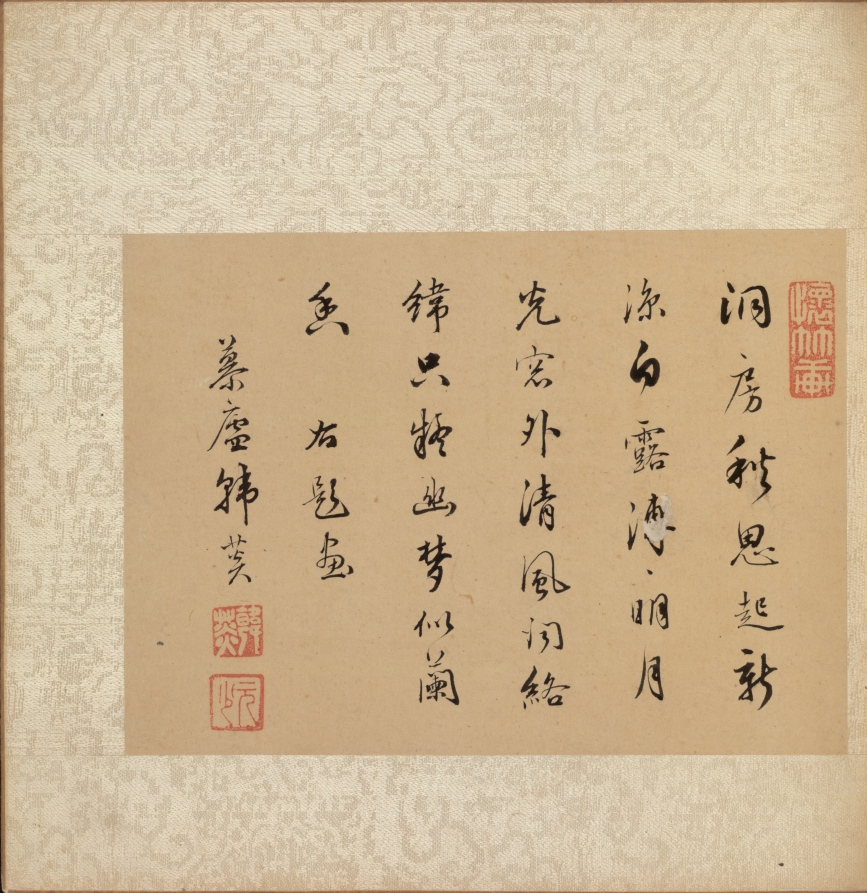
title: Album of Miscellaneous Subjects, Leaf 7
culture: China, Qing dynasty (1644-1911)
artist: Fan Qi (Chinese, 1616–after 1694)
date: early 1650s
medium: album leaf, ink and color on silk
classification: Painting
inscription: Artist seal: Fan Qi 樊圻. Poem by Han Tan 韓菼 (1637–1704): Thoughts of autumn in the nuptial chamber with the new chill arising,/ The white frost all pervasive with a bright moon shining./ Outside the window, a crisp wind conveys the sound of crickets./ Within this quiet dream, I seem to sense the fragrance of orchids.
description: Leaf 7 Han Tan's colophon reads: Thoughts of autumn in the nuptial chamber with the new chill arising, The white frost all persuasive with a bright moon shining. Outside the window, a crisp wind conveys the sound of crickets. Within this quiet dream, I seem to sense the fragrance of orchids.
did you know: The cricket stands on the yellowing leaf of a ripening rice plant.